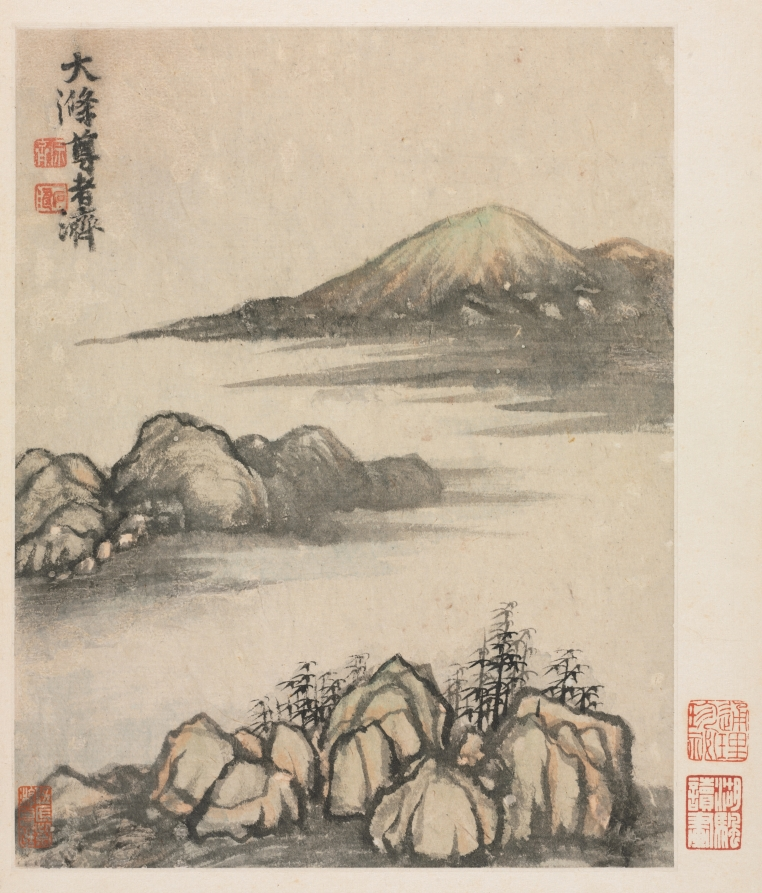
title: Reminiscences of Qinhuai River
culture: China, Qing dynasty (1644-1911)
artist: Shitao (Chinese, 1642–1707)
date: 1642–1707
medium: album leaf, ink and color on Song paper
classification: Painting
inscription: 大滌尊者濟 [印]原濟; 石濤